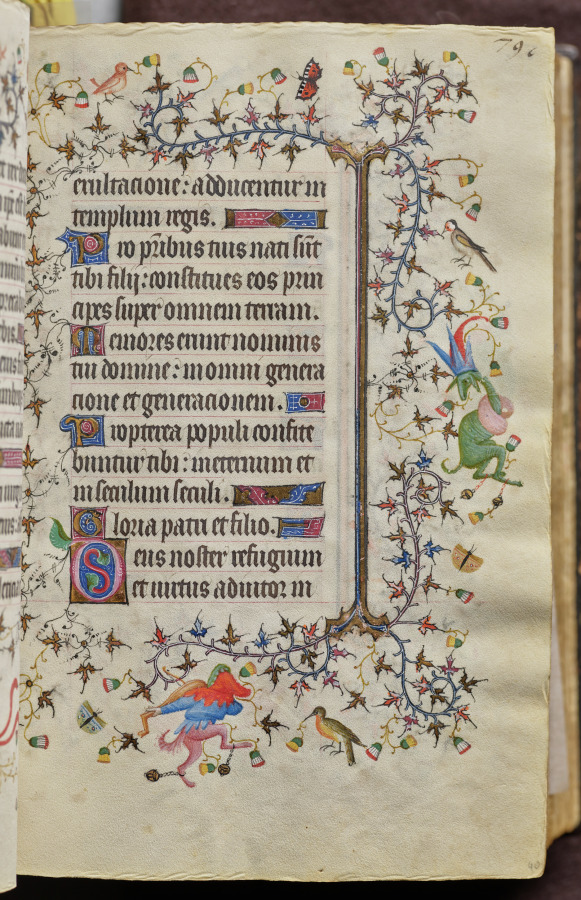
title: Hours of Charles the Noble, King of Navarre (1361-1425): fol. 40r, Text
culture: France, Paris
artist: Master of the Brussels Initials and Associates (French)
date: c. 1405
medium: ink, tempera, and gold on vellum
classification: Bound Volume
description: This precious book was highly prized by its owner, Charles III, King of Navarre, a French-born prince whose coat of arms is painted on 20 folios. Charles visited Paris on numerous occasions and likely acquired this volume there in 1404. Paris was the center of the European book trade at the time and attracted illuminators from many parts of Europe. This manuscript represents one of the most remarkable fusions of French and Italian taste in book illumination. Though conforming to Parisian standards, most of the book’s major miniatures are the work of the Brussels Initials Master, an Italian illuminator who previously worked in Bologna and Padua.